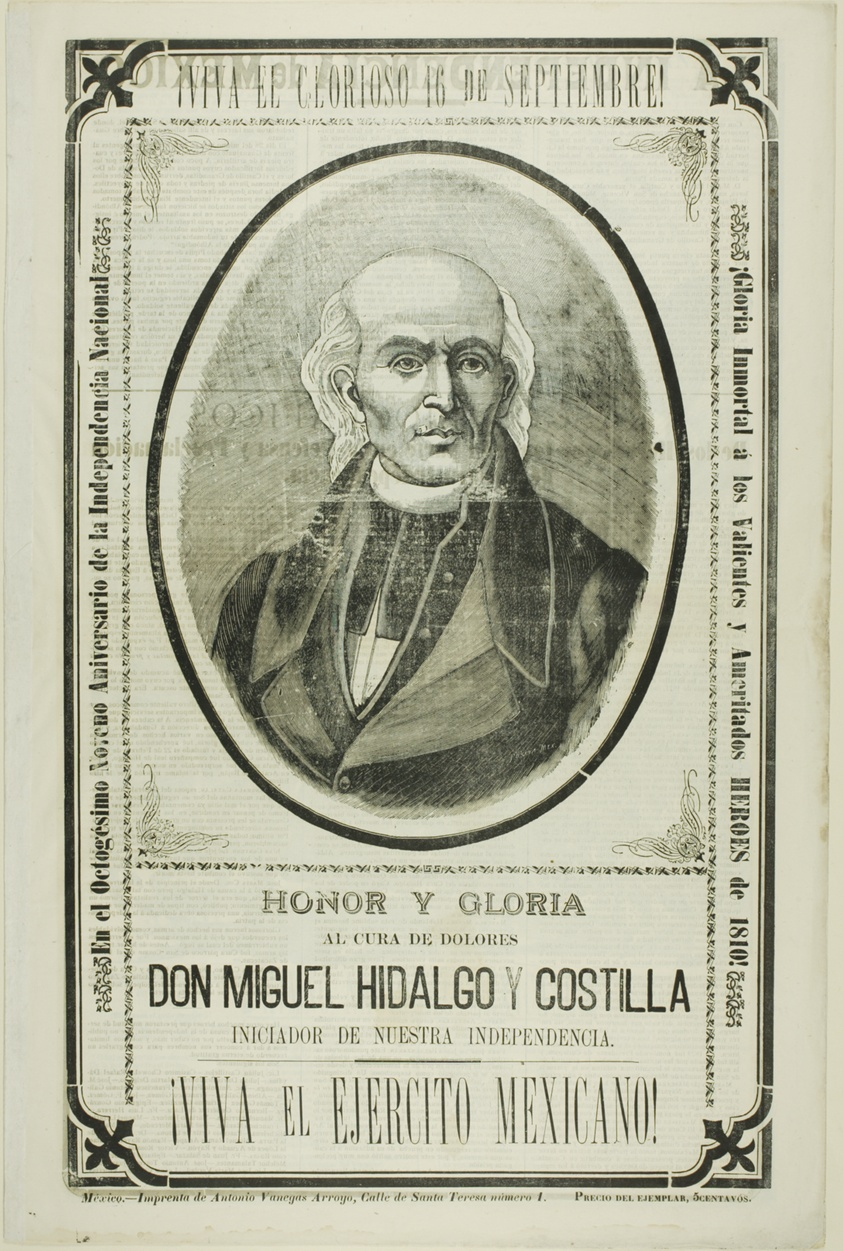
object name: Print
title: Long Live the Glorious 16th of September! Honor and Glory to the Priest from Dolores Don Miguel Hidalgo y Castilla, Initiator of our Independence. Long Live the Mexican Army!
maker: José Guadalupe Posada (Mexican, 1852-1913)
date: 1899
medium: Relief engraving or photo relief etching on paper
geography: Mexico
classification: lithograph; print; prints and drawing